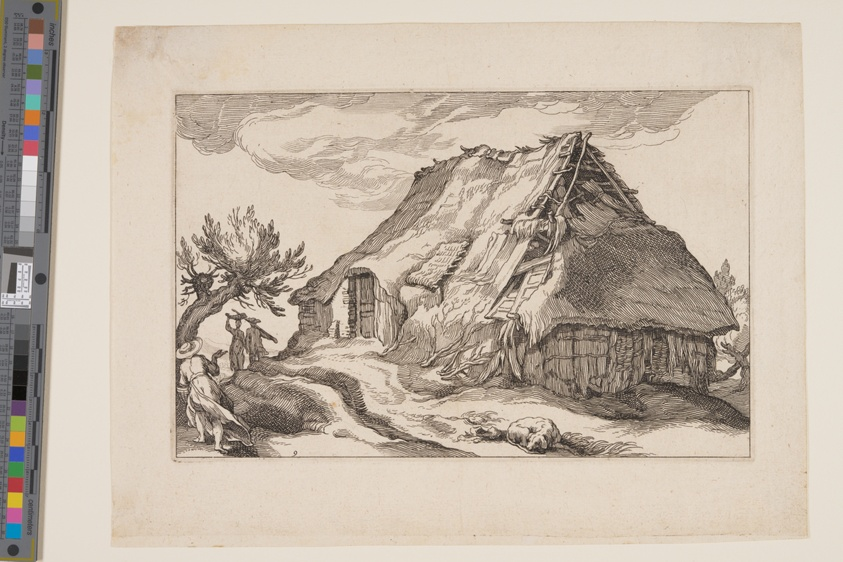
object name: Print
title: Plate 9, from Landscapes with Farmhouses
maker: Boëtius Adamsz. Bolswert (Flemish, 1580–1633); after Abraham Bloemaert (Dutch, 1566–1651)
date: 1614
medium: Etching on ivory laid paper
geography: Flanders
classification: print; paper; prints and drawing; etching